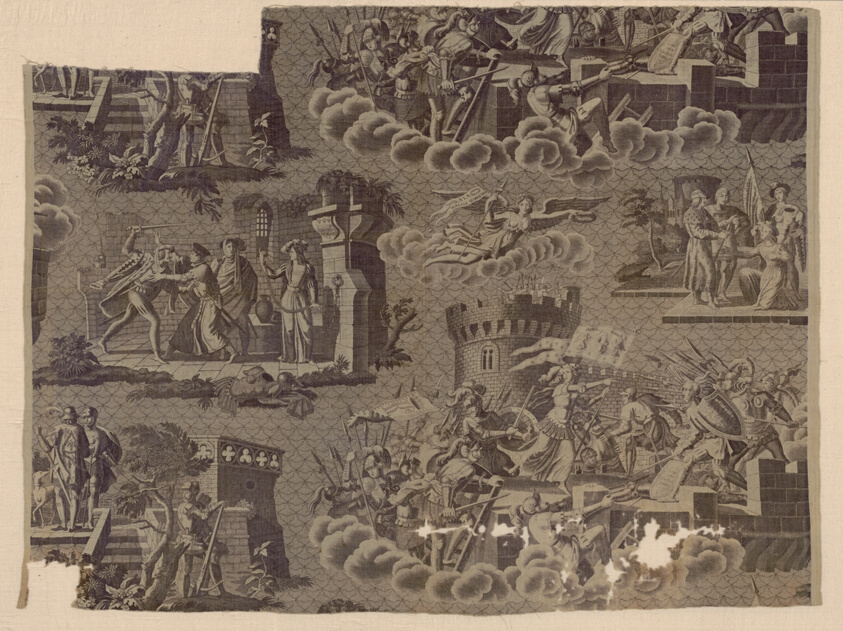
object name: Textile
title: Jeanne d'Arc (Joan of Arc)(Furnishing Fabric)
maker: Fleury Francois Richard (French, 1777-1852); France, Rouen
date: c. 1820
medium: Cotton, plain weave; engraved roller printed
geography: Rouen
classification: textile; weaving - printed; furnishing textile